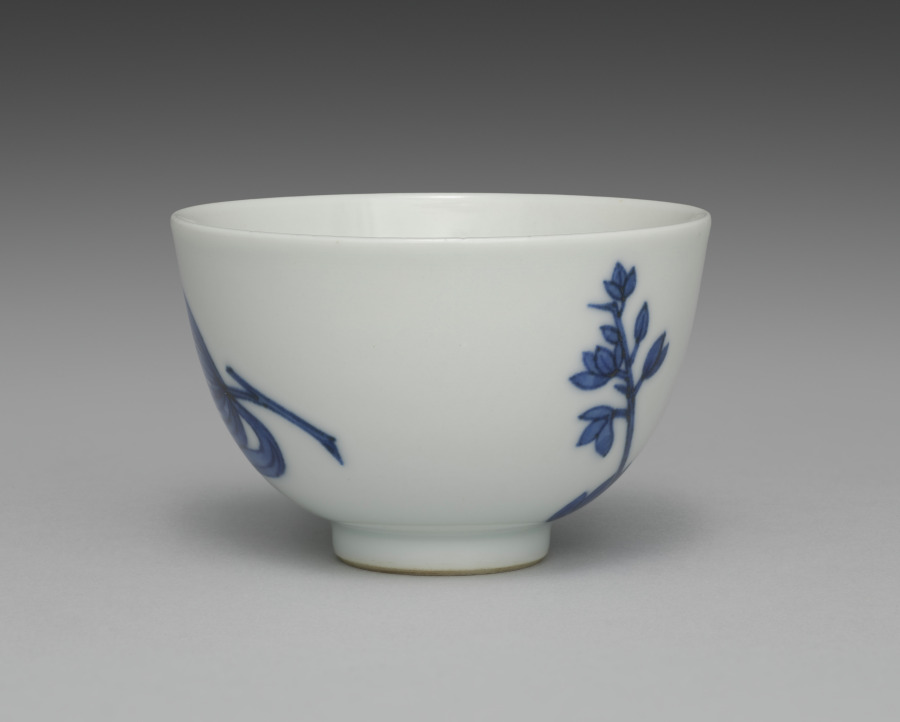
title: Teacup from Tea Set with Orchids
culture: Japan, Meiji period (1868–1912)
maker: Seifū Yohei III (Japanese, 1851–1914)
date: c. 1893–1914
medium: Porcelain with underglaze blue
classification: Ceramic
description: Although the teapot here is stored in a separate box from the five cups, these six pieces may once have been part of a tea set that included other tools such as a water cooler. The teacups have orchid flowers on both sides in underglaze blue, as well as a blue band inside the footring. The teapot has the same design and a blue band painted around the bottom of the lid’s knob. The cups’ long wood storage box is stamped on the exterior, over the lid and base, with a small red seal reading “Satō.” The same seal appears on five small squares of yellow textile, one placed in the bottom of each compartment in the teacup storage box. These are additional to the customary yellow cloths stamped with a “Seifu” seal. Interestingly, four of the Seifū cloths are stamped with an ovoid seal, while the remaining cloth, which is a slightly lighter color, has an unusual seal that is not quite gourd-shaped and with the fū of Seifū in a stylized, unrecognizable form. The teapot has its own box with a Satō seal and is wrapped with an orange textile stamped with the same unusual Seifū seal. A set with a very similar surface design is in the Brooklyn Museum. The Brooklyn set has a water cooler and a small pitcher, in addition to the teapot and cups, and all are in a single storage box. This box records the tea tools as made with kanpakuji, or “bright-jewel white porcelain,” counted among Yohei III’s most important inventions, and carved images. In fact, both sets have a white surface much closer in coloration to the cool white of porcelain clay used in Kyoto at the time, and the designs are simply painted. The Brooklyn set was thus likely mismatched at some point with a box intended for another tea set. Nonetheless, the box may have helped prevent the set’s original components from being dispersed, and the set itself provides insight into how the other tools from the present set may have looked.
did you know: This tea set with orchids has a side-handled pot called a kyūsu, used for steeping, straining, and serving tea.